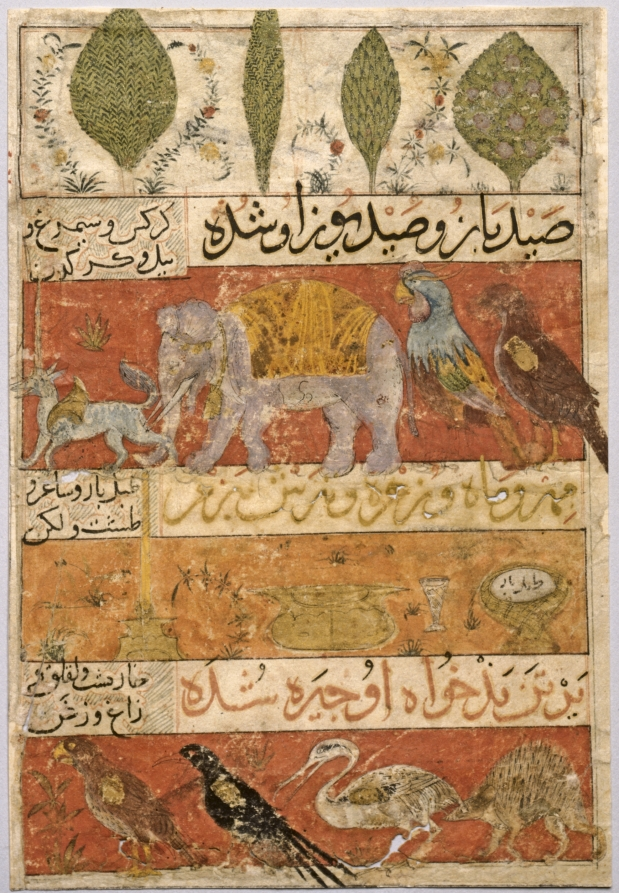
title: Animals, Birds, and Plants (verso) from a Mu'nis al-Ahrar fi Daqa'iq al-Ash'ar (The Free Men's Companion to the Subtleties of Poems) of Muhammad Ibn Badr al-Din Jajarmi (active 1340s)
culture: Iran, Shiraz, Ilkhanid period (1256-1353)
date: c. 1341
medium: opaque watercolor, ink, and gold on paper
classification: Manuscript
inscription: script: Thulth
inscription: Making the garden of his pleasure their homeland are:/ Rosebush and box-tree, cypress and elm./ Prey to hawk and prey to his cheetah are:/ Vulture and sīmurgh, elephant and rhinoceros./ Sun and Moon, Venus and Mercury are at his feast:/ Falcon-drum and goblet, bowl and candlestick./ Overwhelming the corpses of his foes are:/ Porcupine and stork, raven and kite.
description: This is one of several pages that were removed from a unique manuscript of this otherwise unknown work, which bears a colophon stating that it was written by the author and finished "Ramadan, 741" (February 1341). Illustrations on both sides include various animals, trees, and objects such as weapons, musical instruments, and jewels.